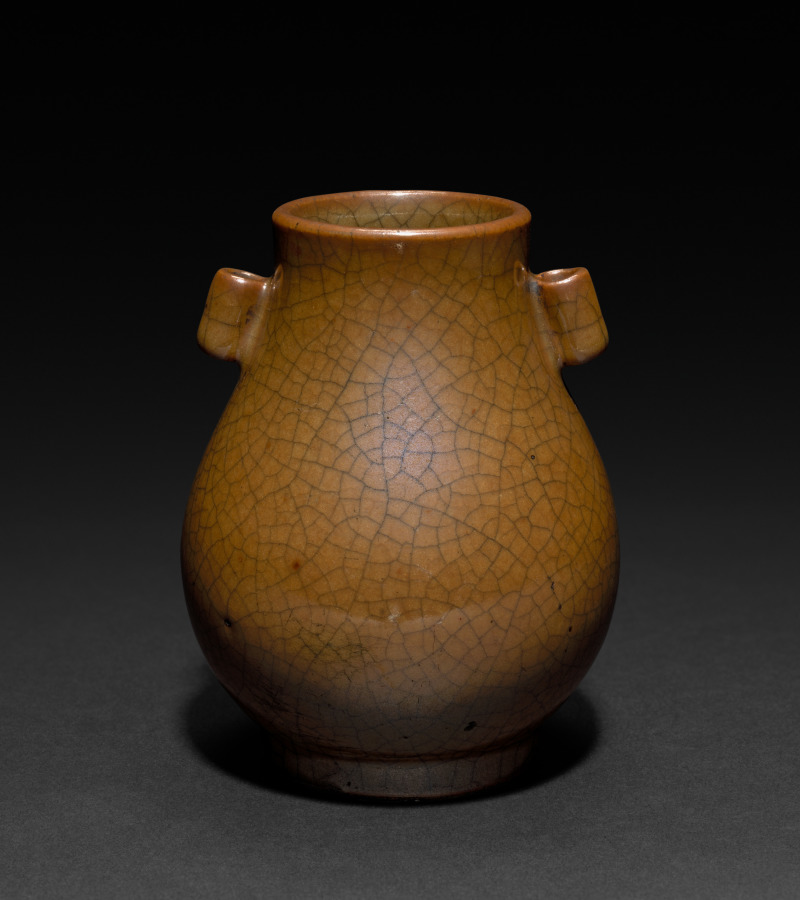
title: Pear-shaped Jar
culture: China, Qing dynasty (1644-1911), Kangxi reign (1661-1722)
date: 1661–1722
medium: porcelain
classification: Ceramic